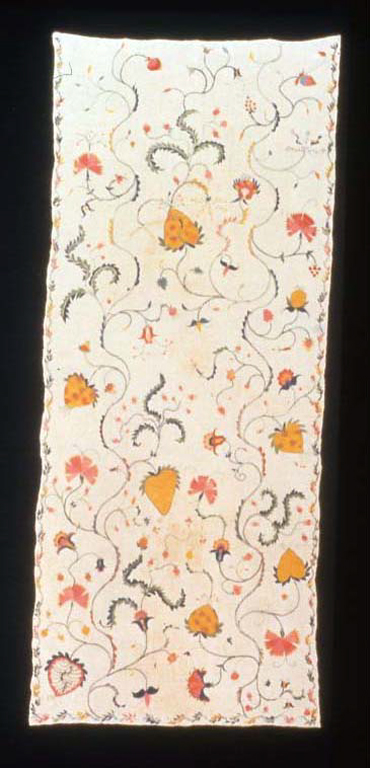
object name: Textile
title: Bed Curtain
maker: Hannah Hinman Twitchell Pierce (American, 1721/22–1770); United States, Connecticut, Southbury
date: c. 1760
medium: Linen, plain weave; embroidered with wool in cross, Romanian, running, satin, and stem stitches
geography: Connecticut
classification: textile; needlework (visual works)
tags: flowers, foliage